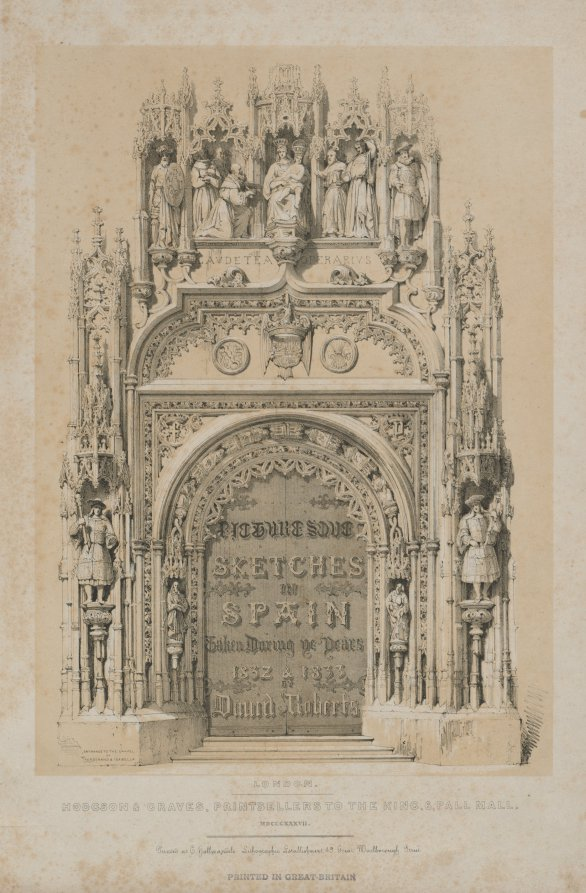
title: Picturesque Sketches in Spain: Title Page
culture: England, 19th century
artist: Thomas Allom (British, 1804–1872)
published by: Hodgson & Graves, London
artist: after David Roberts (Scottish, 1796–1864)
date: 1837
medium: color lithograph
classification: Print